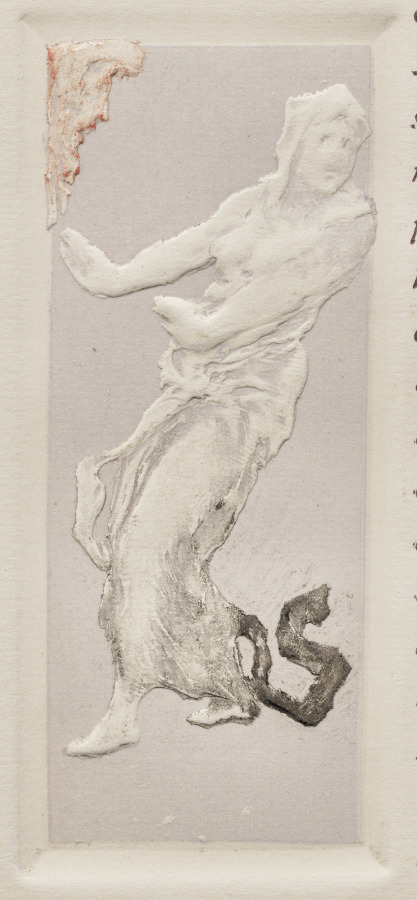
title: Decorative Knife Motif/ Dancing Woman with Arms in Pushing Gesture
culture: France, early 20th Century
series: La Loïe Fuller, by Roger Marx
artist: Pierre Roche (French, 1855–1922)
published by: Les Cents Bibliophiles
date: 1904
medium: gypsograph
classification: Bound Volume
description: Although best known as a sculptor, Roche was a versatile and prolific artist who worked in many mediums. Loïe Fuller, the pioneer of modern dance who took Paris by storm in 1892, was one of his favorite subjects. He portrayed her in clay, bronze, marble, plaster, and in a series of gypsographs that illustrated an essay by the art critic Roger Marx. The book was described as "a precious monument to Loïe Fuller."